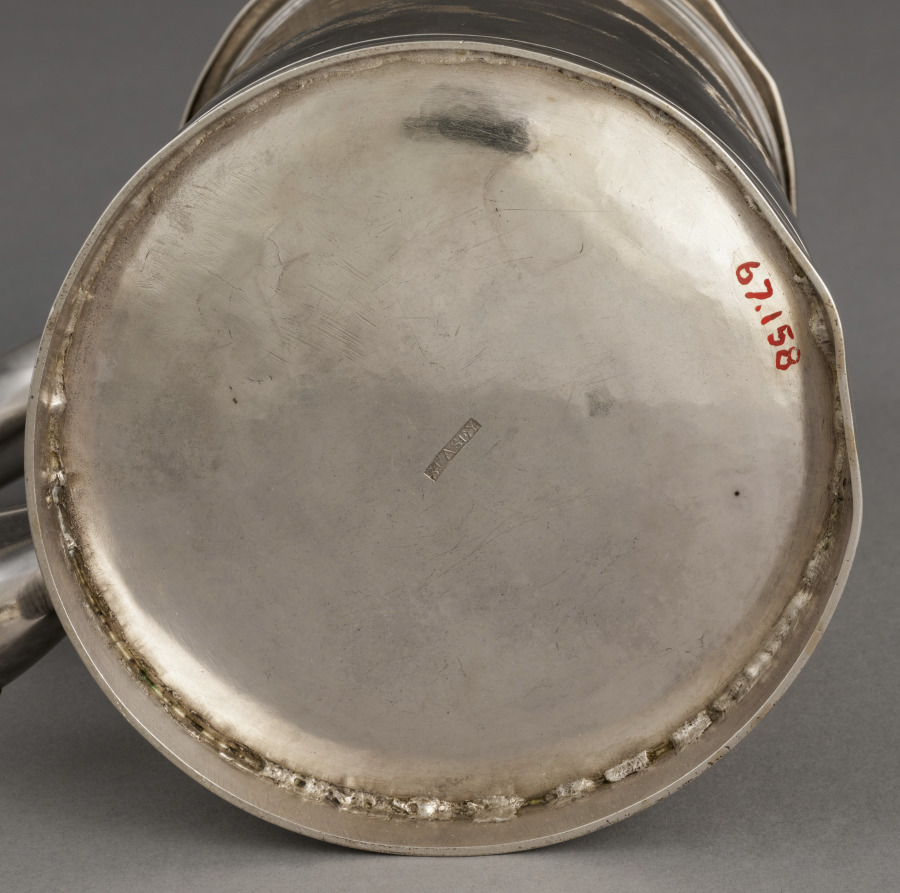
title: Tankard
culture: America, Rhode Island, Exeter and South Kingston, 18th century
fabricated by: Samuel Casey (American, c. 1724–c. 1780)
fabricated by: Thomas Arnold (American, 1734–1828)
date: c. 1750–1770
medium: silver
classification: Silver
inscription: engraved "G" over "W * I" in block letters on top of handle.